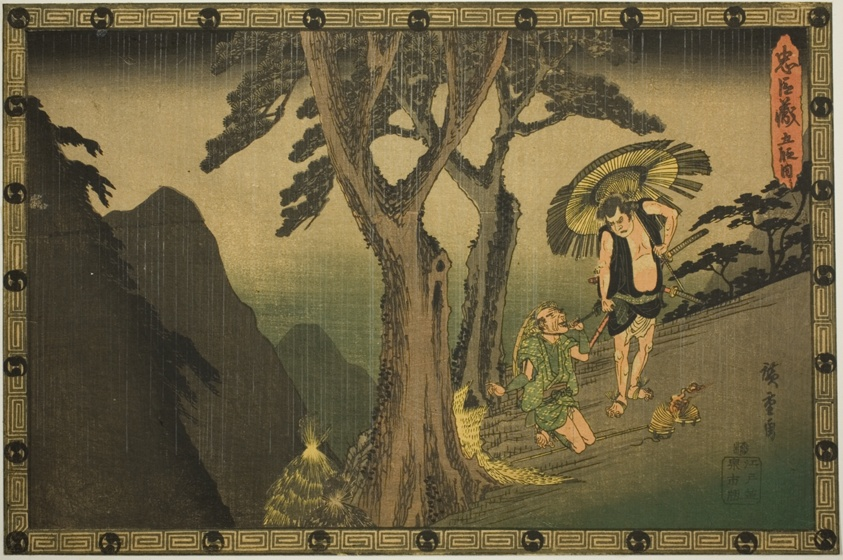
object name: Print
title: Act 5 (Godanme), from the series "The Revenge of the Loyal Retainers (Chushingura)"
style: Japanese (culture or style)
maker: Utagawa Hiroshige 歌川 広重; Japanese, 1797-1858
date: c. 1834/39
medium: Color woodblock print; oban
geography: Japan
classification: woodblock print; print; asian art